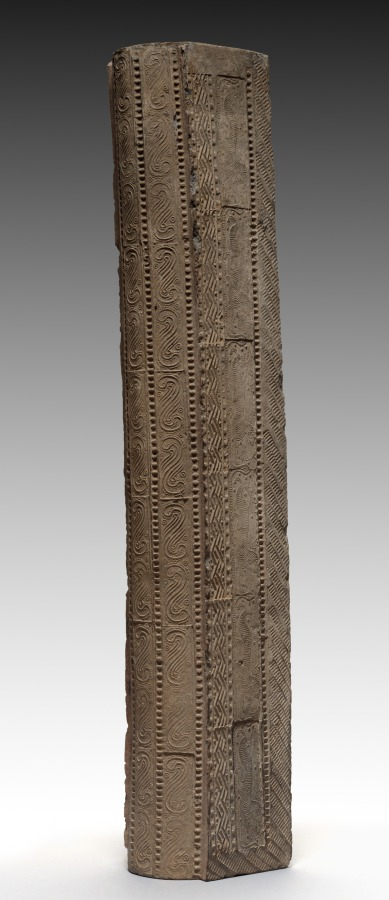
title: Hollow Tile: Lintel from Tomb-Chamber Doorway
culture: China, Han dynasty (202 BCE–220 CE)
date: 100–200 CE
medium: earthenware, die-stamped relief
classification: Ceramic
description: Striding tigers (top), racing horsemen (right column), and reverent officials (left column) are stamped into the surface of this underground portal to a tomb. The doorway preserves in stone the post-and-lintel structure, a basic element of Chinese wooden architecture. By the first century CE, a revolution in Chinese tomb construction and furnishing had taken place. Tombs lined with decorated bricks and tiles replace the earlier tombs constructed with only rammed-earth walls. Ceramic surrogates or models of stoves, houses, servants, and pets filled these more durable chambers, symbolically extending the creature comforts of this world into the world after death.